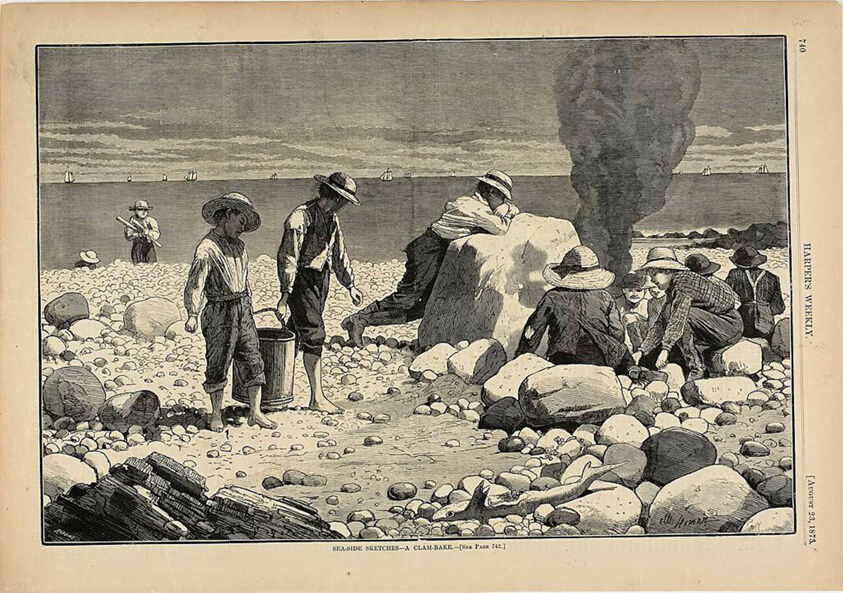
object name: Print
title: Sea-Side Sketches—A Clam Bake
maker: Winslow Homer (American, 1836-1910); published by Harper's Weekly (American, 1857-1916)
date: published August 23, 1873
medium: Wood engraving on paper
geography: United States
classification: wood engraving; print; prints and drawing